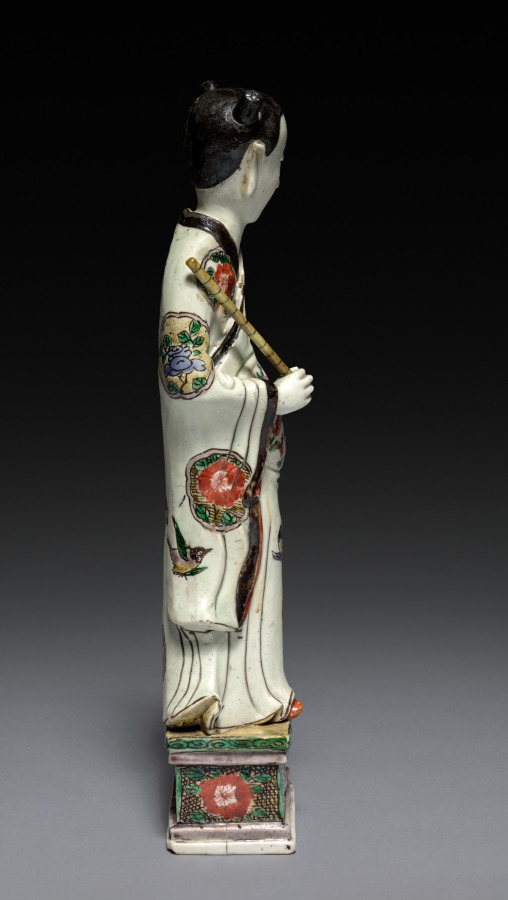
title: Daoist Immortal Han Xiangzi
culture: China, Jiangxi province, Jingdezhen kilns, Qing dynasty (1644-1911), Kangxi reign (1662-1722)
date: 1662–1722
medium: porcelain with famille verte overglaze enamel decoration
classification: Ceramic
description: One of the Eight Immortals, Han Xiangzi was said to be the nephew of the famous Tang dynasty poet Han Yu (768–824). He is usually shown as a young boy holding a flute. Han is wearing a white robe decorated with peonies, hinting at his identity as the patron of florists and his legendary ability to make peonies bloom in winter. A four-clawed dragon, a decorative motif typically used for imperial nobility and certain high-ranking officials, decorates Han’s robe.